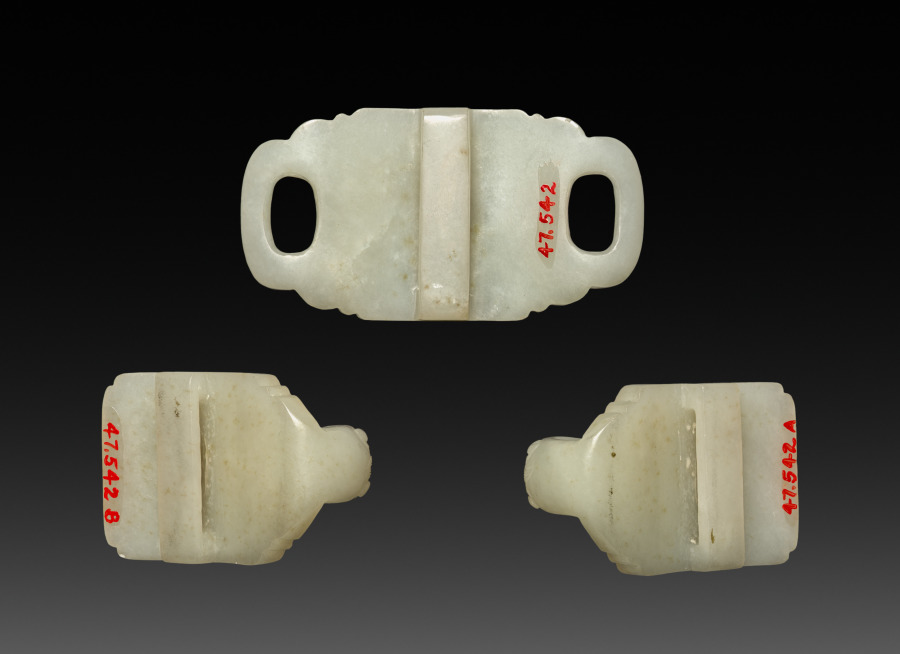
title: Buckle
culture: China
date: 1800s–1900s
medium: white jade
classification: Jewelry